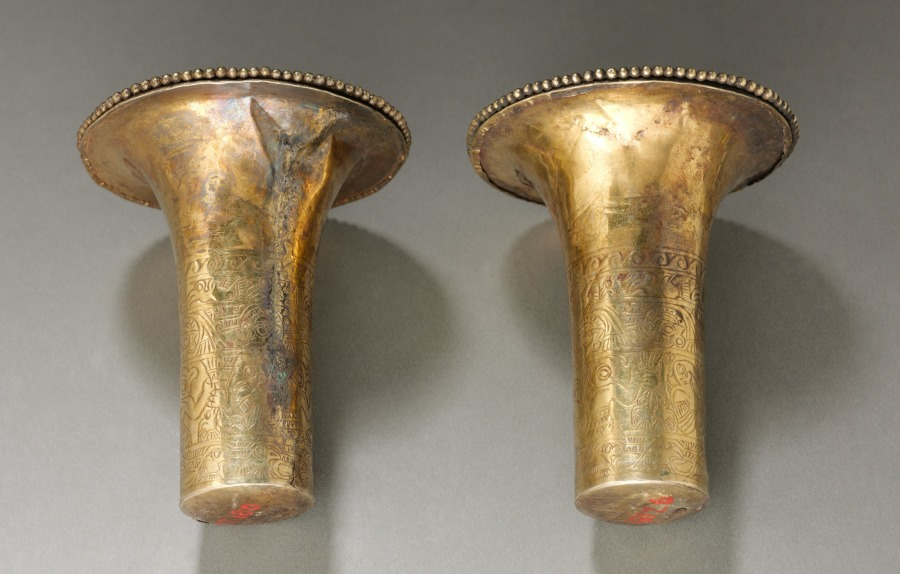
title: Pair of Ear Flares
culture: Peru, North Coast, Chimú style (900-1470)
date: 900–1470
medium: hammered gold alloy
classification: Metalwork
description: North Coast ear ornaments typically have a long shaft that balanced the weight of the glorious frontal. This pair illustrates Chimú interest in the sea, which had great economic and religious importance. On the shafts are bands of seabirds and waves, and a similar pattern edges the frontals, which were altered in modern times. Originally solid disks, the frontals' centers were cut out and a dotted band was added to the rim.